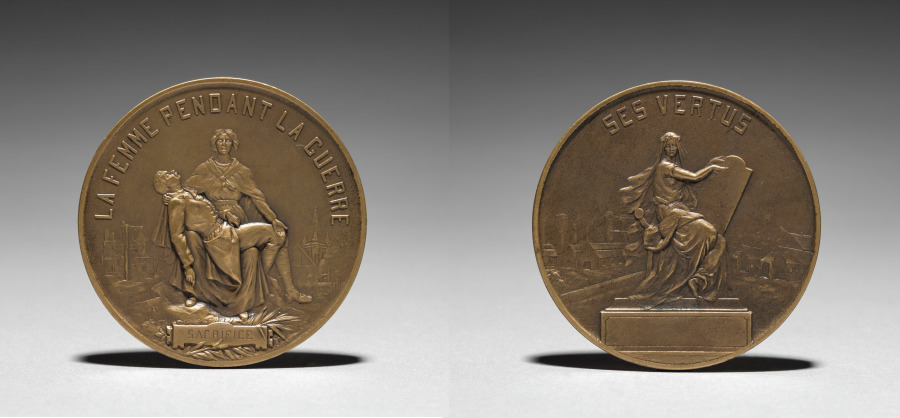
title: Medallion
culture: France, 19th-20th century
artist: Henri Emile Allouard (French, 1844–1929)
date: 1918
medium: bronze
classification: Metalwork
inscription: "Sacrifice. La femme pendant la Guerre" (woman during the war); signed: "H. Allouard 1918."